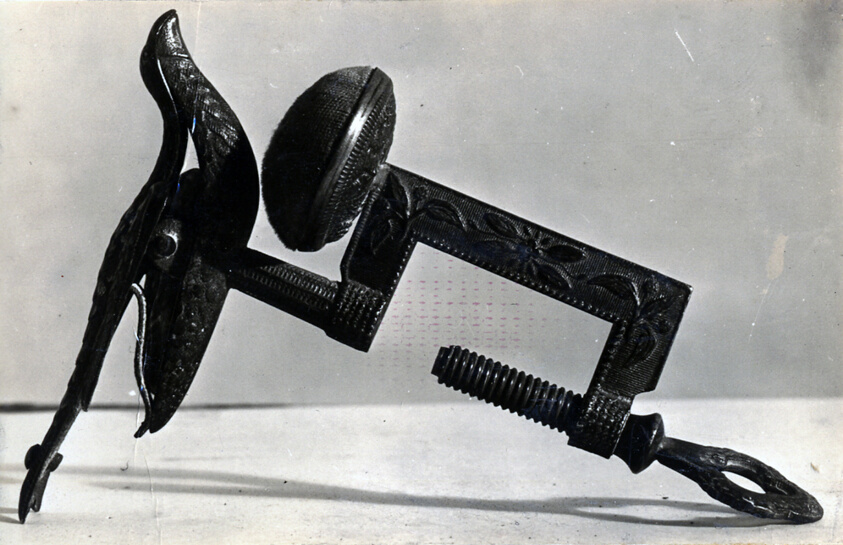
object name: Textile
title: Sewing Bird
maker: United States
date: c. 1853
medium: Brass-colored, with bird-shaped clamp and floral design on c-clamp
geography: United States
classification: sewing tools; textile working equipment; hemming birds; textile